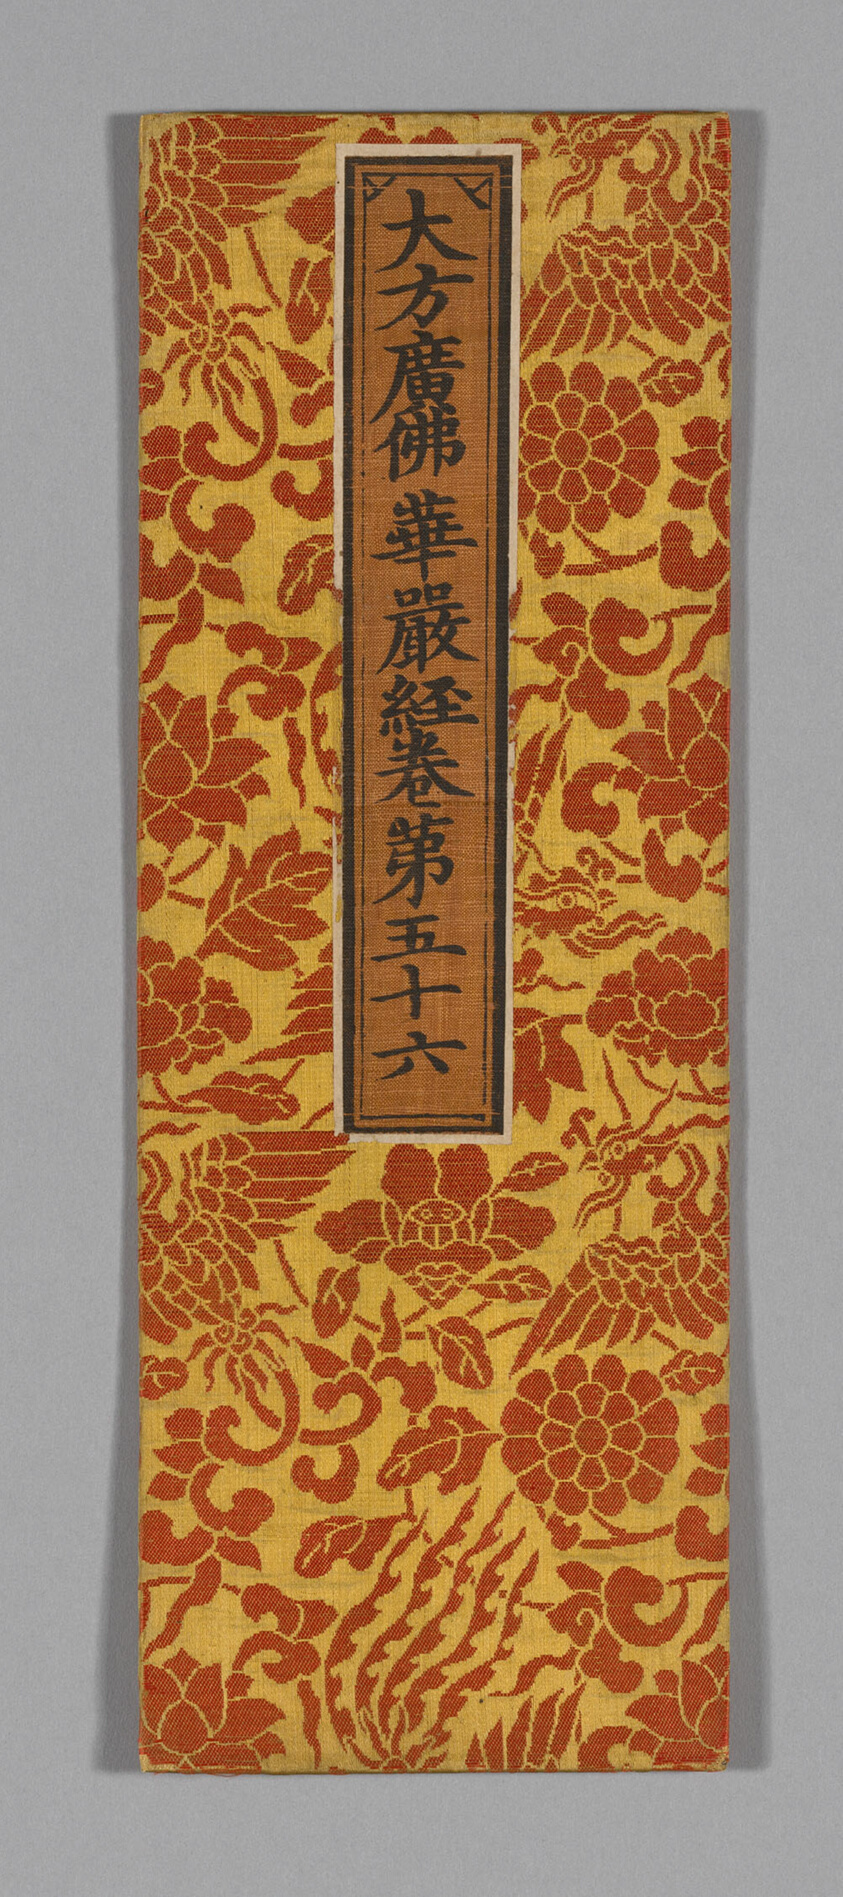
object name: Textile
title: Sutra Cover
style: ming, Chinese (culture or style), East Asian, asian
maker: China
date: Ming dynasty (1368–1644), c. 1590s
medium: Silk, satin weave with patterning wefts; wrapped over cardboard; applied label of silk, plain weave; with inscribed title painted and/or printed with ink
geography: China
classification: textile; weaving